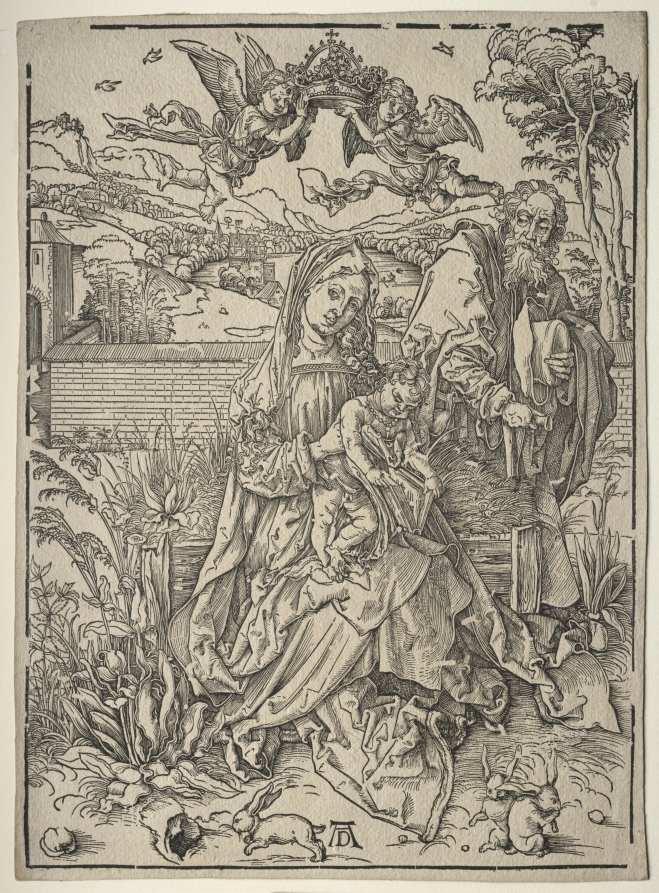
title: Holy Family with the Three Hares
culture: Germany, late 15th-early 16th century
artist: Albrecht Dürer (German, 1471–1528)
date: 1497–98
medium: woodcut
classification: Print